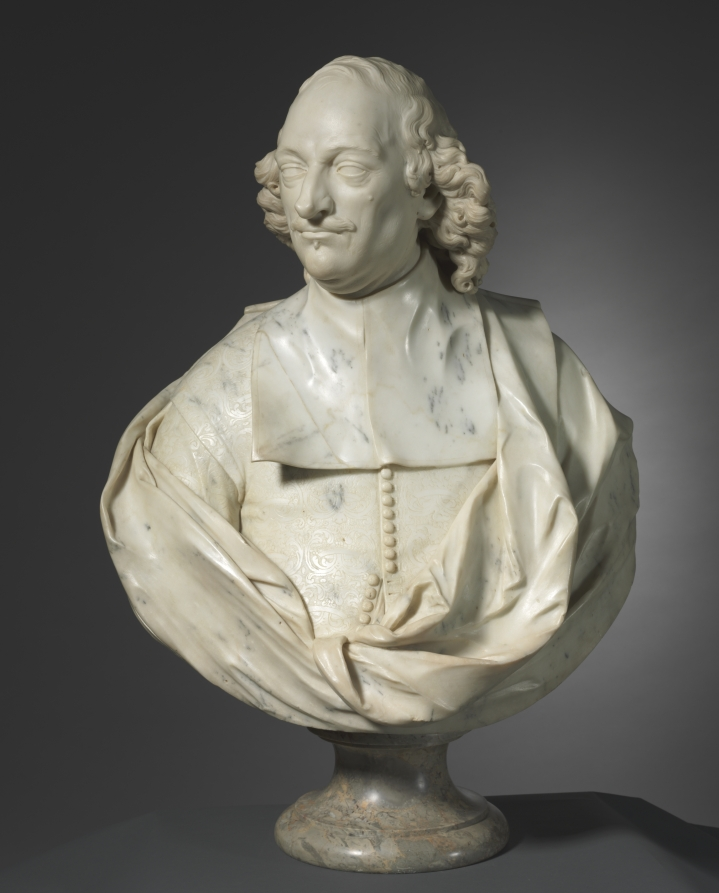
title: Portrait of Fabrizio Naro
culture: Italy, Rome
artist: Domenico Guidi (Italian, 1625–1701)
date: c. 1680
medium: marble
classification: Sculpture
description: This figure’s individualized facial expression, dynamic turn of the head and animated drapery are all characteristic of 17th-century Roman portrait sculpture. Guidi, a pupil of Alessandro Algardi, juxtaposed broad swaths of drapery and deeply drilled and carved hair with delicate surface detail, visible here in the patterning of the jacket and the faint suggestion of a beard. Based on a comparison with a later portrait on the family tomb in the church of Santa Maria sopra Minerva, Rome, the sitter has been identified as Fabrizio Naro (d. 1697), marquis of Mompei.